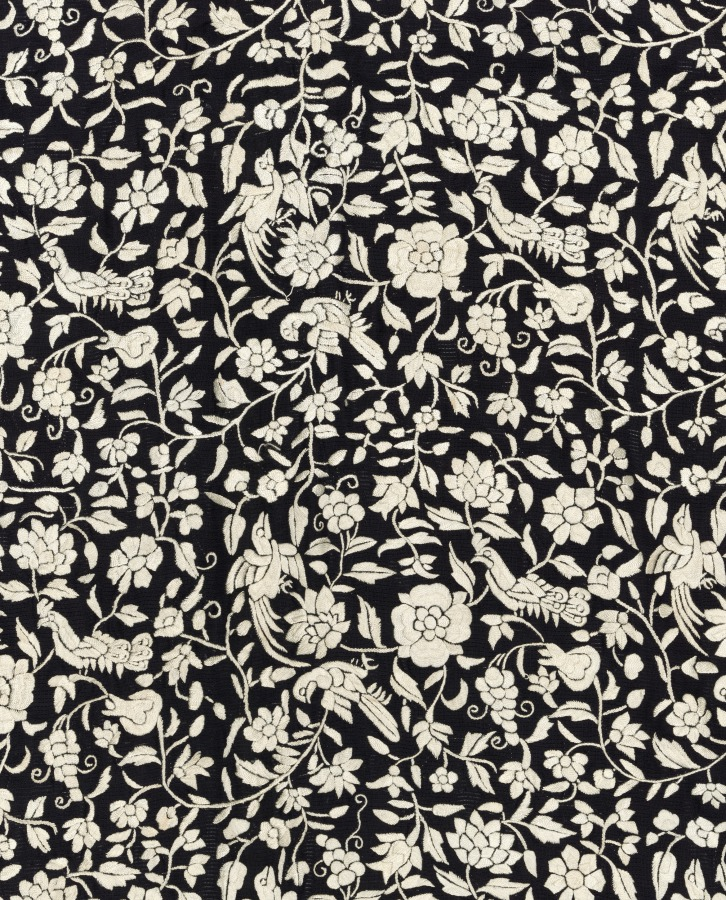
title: Shawl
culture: China, 19th century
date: 1800s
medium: embroidery, silk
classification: Embroidery